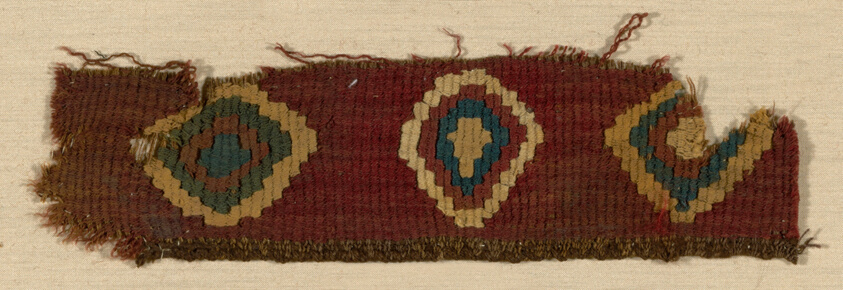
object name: Textile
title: Fragment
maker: Peru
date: 1–1532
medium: Slit tapestry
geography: Peru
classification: textile; weaving